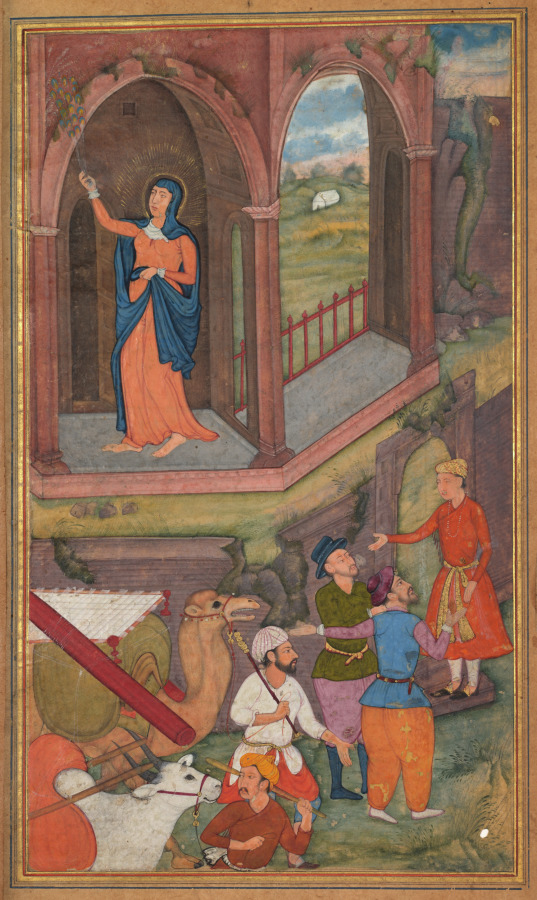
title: The place of Jesus’s birth (folio 25 recto), from a Mirror of Holiness (Mir’at al-quds) of Father Jerome Xavier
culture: Mughal India, Allahabad, made for Prince Salim (1569–1627)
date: 1602–4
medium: Gum tempera, ink, and gold on paper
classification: Manuscript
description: Instead of a stable, the artist has interpreted the place of Jesus’s birth as an abandoned ruin. Mary is cleaning it with a peacock-feather whisk, while Joseph negotiates with a man dressed in full Mughal attire at the doorway. The camel is laden with belongings and an Indian-style bed.